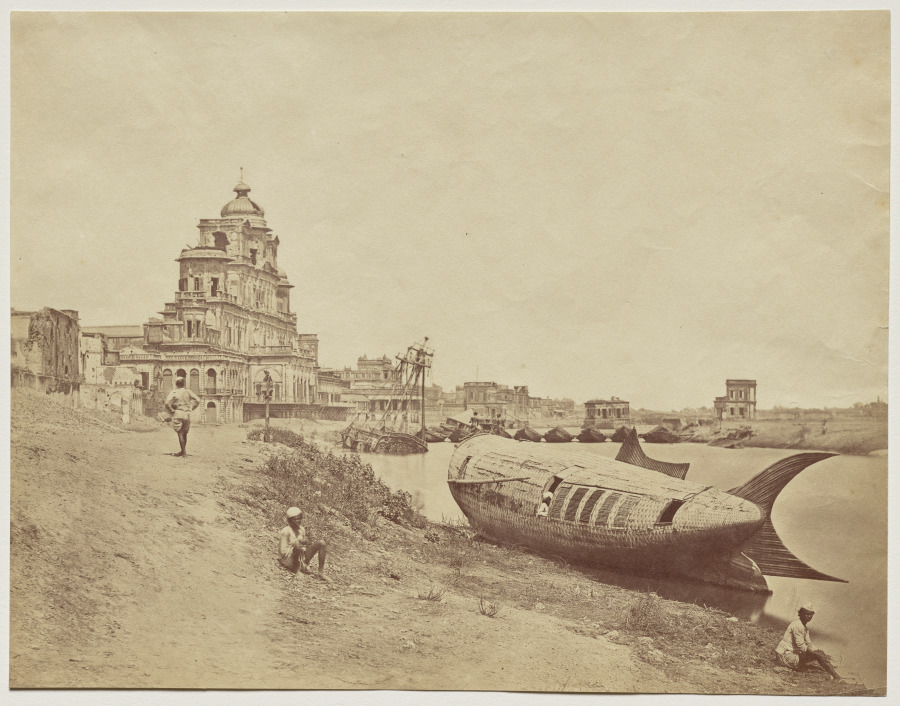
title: Chutter Manzil Palace, with the King's Boat in the Shape of a Fish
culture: England, 19th century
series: Lucknow After the Siege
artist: Felice A. Beato (British, 1832–1909)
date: 1858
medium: albumen print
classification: Photograph